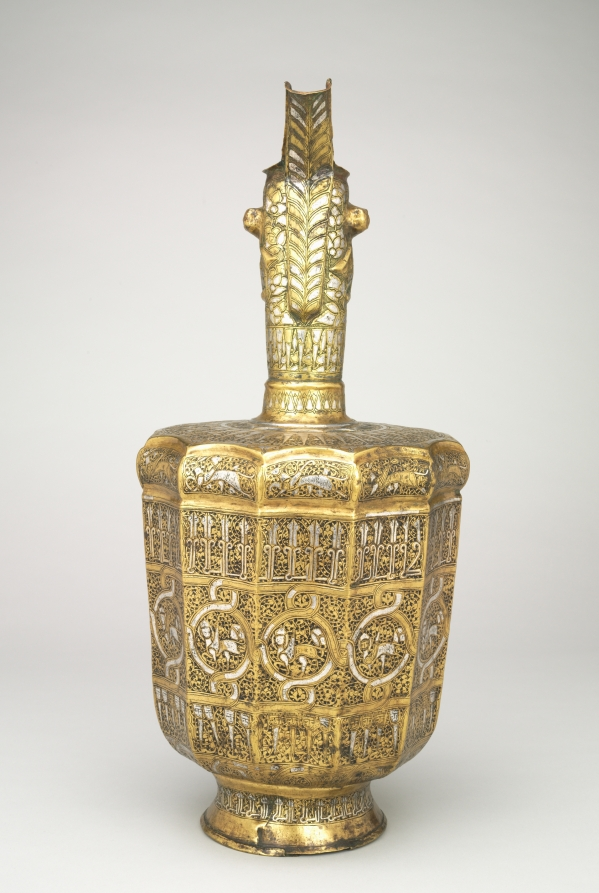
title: Twelve-sided Ewer with Sphinxes and Human-Headed Inscriptions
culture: Iran, Khurasan, Ilkhanid period (1256–1353)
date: 1300–1350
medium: hammered sheet of brass inlaid with silver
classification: Metalwork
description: The spout and neck of the ewer display a crouching and seated lion in raised relief. Winged hare-like animals march around the top of the body, set off by foliate scrolls, while sphinxes process around the center. The bottom of the ewer’s body is encircled by an inscription with human heads, which only appear on metalwork in Islamic art. Ewers like this, and similar elaborate vessels, would have been used in court banquets and elite homes across the Islamic world.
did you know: Calligraphy with human heads, known as animated script, developed in northeast Iran during the 1100s.